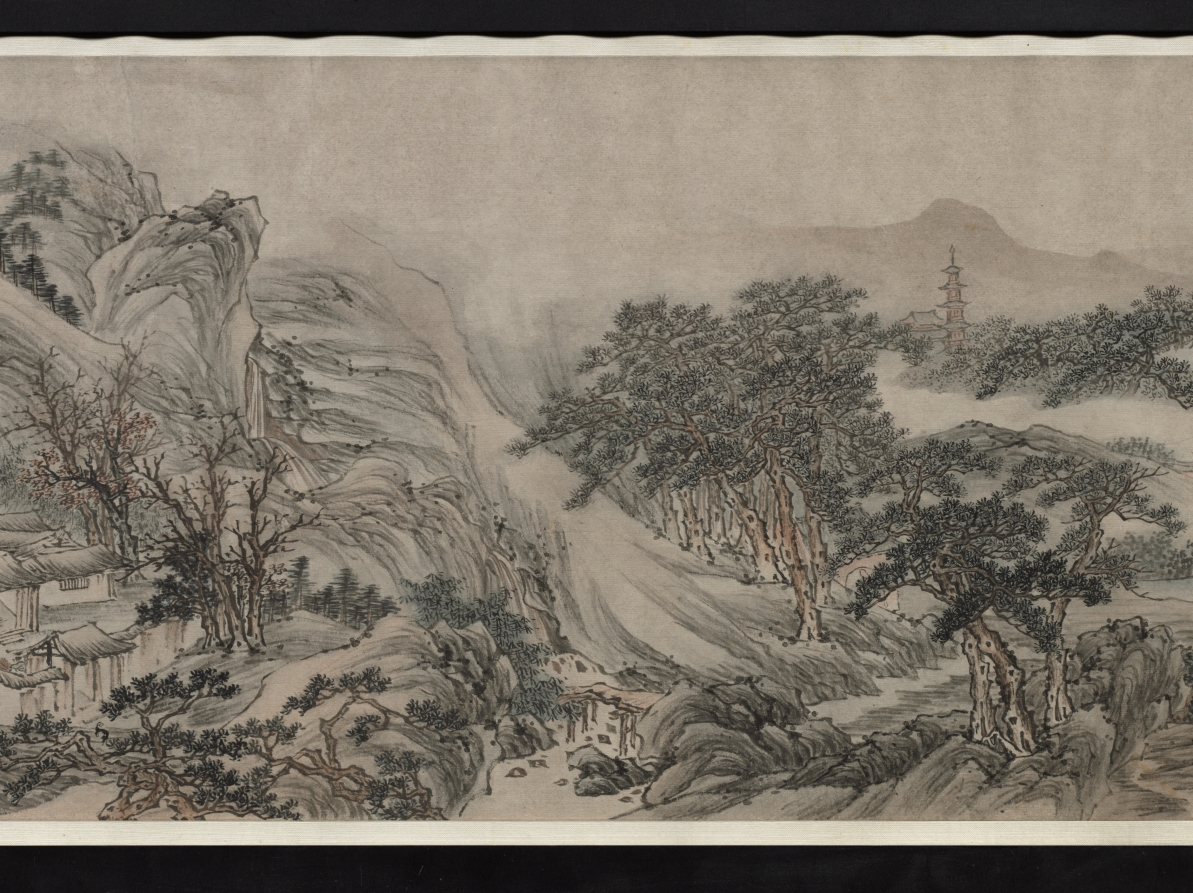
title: Autumn Mist in the Countryside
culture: China, Qing dynasty (1644-1911)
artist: Zou Zhe (Chinese, c. 1610-before 1688)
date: 1647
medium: handscroll, ink and color on paper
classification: Painting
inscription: Artist's inscription, signature, and seal: The first day of the sixth lunar month, the ting-hai year [1647], Tsou Che painted [this]. [seal] Fang-lu.